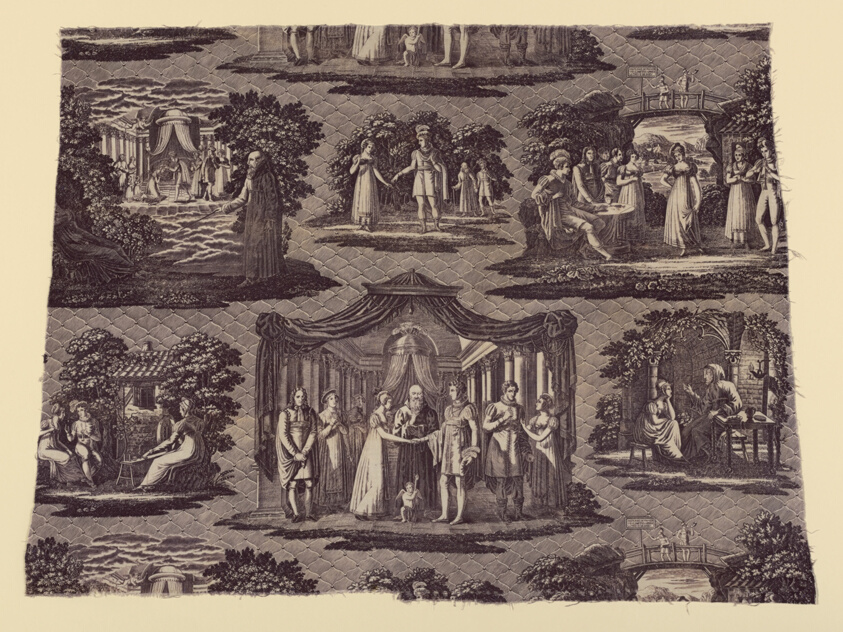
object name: Textile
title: La Trève de Dieu (God's Truce) (Furnishing Fabric)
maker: France, Alsace, Munster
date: c. 1820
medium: Cotton, plain weave; engraved roller printed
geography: Munster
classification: textile; weaving - printed; furnishing textile